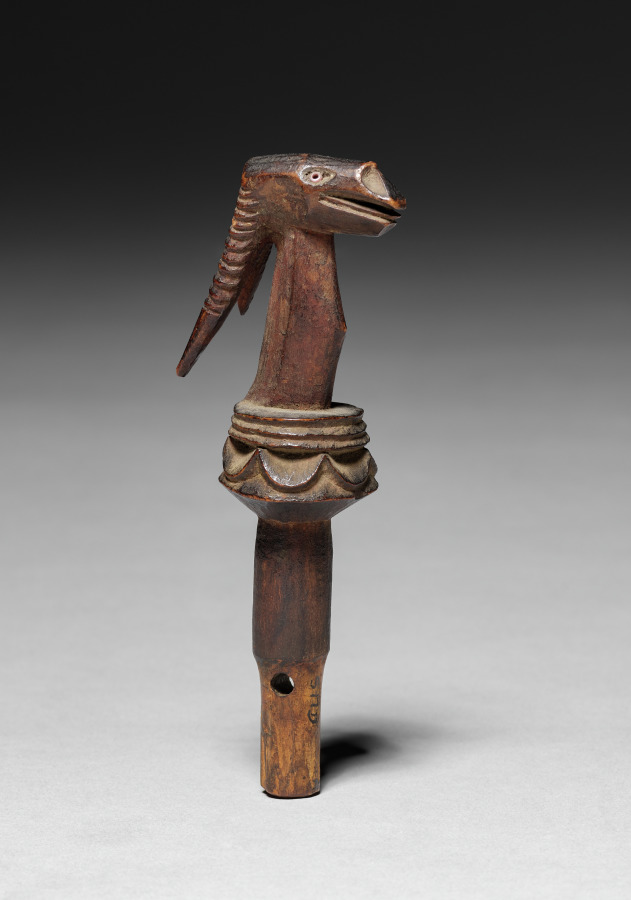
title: Peg (msuruaki) for a Sandal (mtalawanda / mtawanda) or Clog (kiatu cha mti)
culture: Africa, Central Africa, Democratic Republic of Congo, unidentified carver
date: c 1800s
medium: Wood and glass beads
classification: Garment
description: Common in the Indian Ocean region, wooden sandals changed meaning across place and time. This pair’s base elevates the foot as the toes grip an antelope-shaped peg (msuruaki). Crisp geometric sole designs suggest they were rarely worn. East African elites and merchants once had exclusive rights to wooden shoes, wearing elaborate ones only for portraits. Formerly enslaved people living along the coast wore simpler ones from the 1840s onward, adopting elite footwear to assert their liberation. However, slave traders like the Zanzibari “Tippu Tip” (c. 1832–1905) likely brought mitalawanda to Central Africa; stylistic elements of this pair hail from that region.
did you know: This distinctive footwear traveled from Southeast Asia and the Middle East to Africa, first to the Swahili Coast and then further inland to parts of Central Africa. The deity Krishna wears similar shoes (paduka) in an eighteenth-century Indian miniature painting (2003.344).